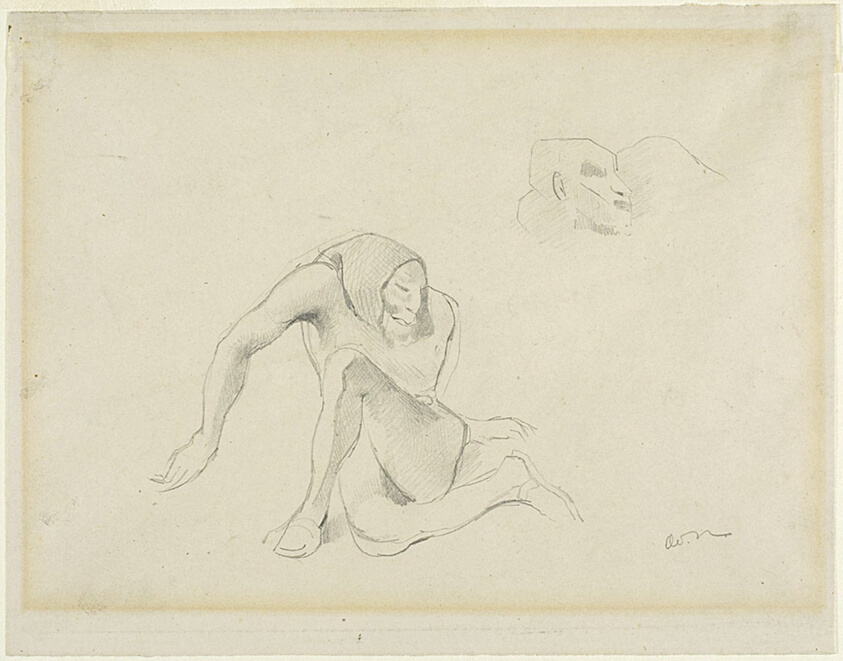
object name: Drawing and Watercolor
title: Two Grotesque Figures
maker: Odilon Redon (French, 1840-1916); after Eugène Delacroix (French, 1798-1863)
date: 1865/68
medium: Graphite on ivory wove paper, discolored to cream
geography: France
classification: graphite; drawings (visual works); prints and drawing; paper